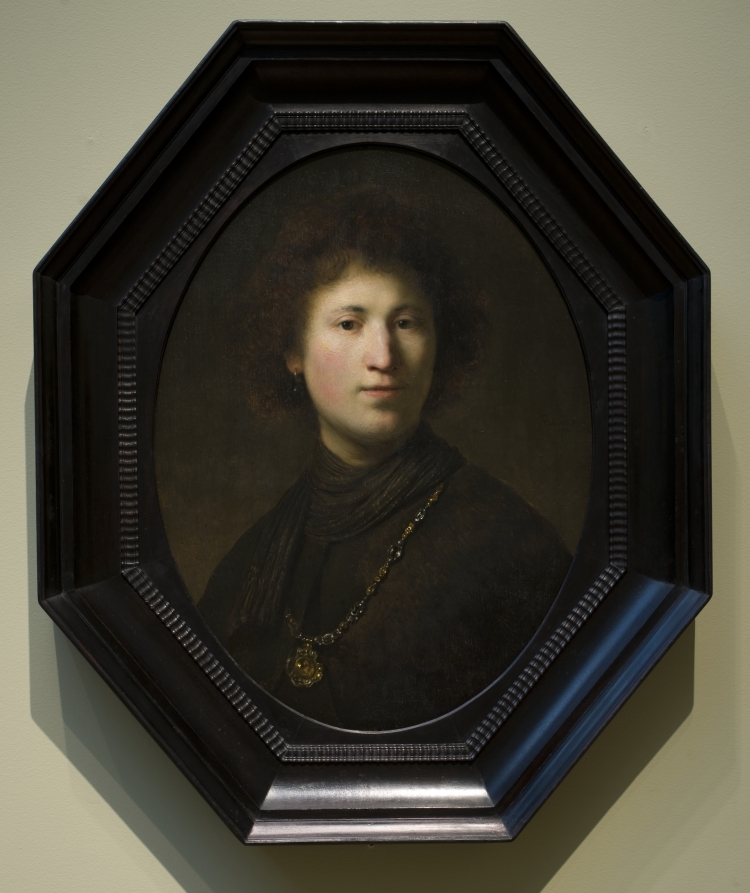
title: A Young Man with a Chain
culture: Netherlands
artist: Rembrandt van Rijn (Dutch, 1606–1669)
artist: and Studio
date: c. 1629 or 1632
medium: oil on wood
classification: Painting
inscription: Signed at right: "RHL van Rijn / 1632 [RHL in monogram]"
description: This painting is an example of a tronie, a Dutch word meaning “head” or “facial expression.” Tronies were not intended to be identifiable portraits, but artistic investigations of facial appearance and fanciful costume. Particularly in the years around 1630, Rembrandt used this popular format to explore different lighting effects and facial expressions. Here, the strong contrast of light and shade shapes the contours of the young man’s face; unusual accessories such as the striped scarf and glittering pendant on a jeweled chain add an exotic touch. Although this painting bears Rembrandt’s monogram, the authorship is not certain. Some scholars have attributed it to Isaac de Joudreville (1613–1648), a pupil and associate of Rembrandt who painted comparable tronies in a similarly smooth and elegant style.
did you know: Once identified as Rembrandt himself, the sitter is now considered an anonymous study of human character.